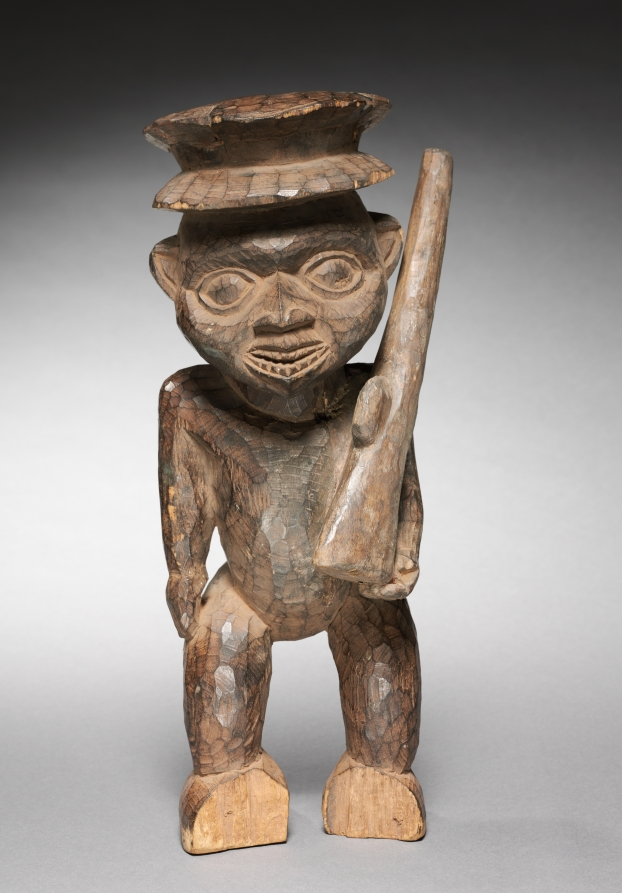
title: Male Figure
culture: Africa, Central Africa, Cameroon, Grassfields region, unidentified maker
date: c. 1905–10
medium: wood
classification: Sculpture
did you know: The weapon this figure holds is a later replacement added in Ohio.